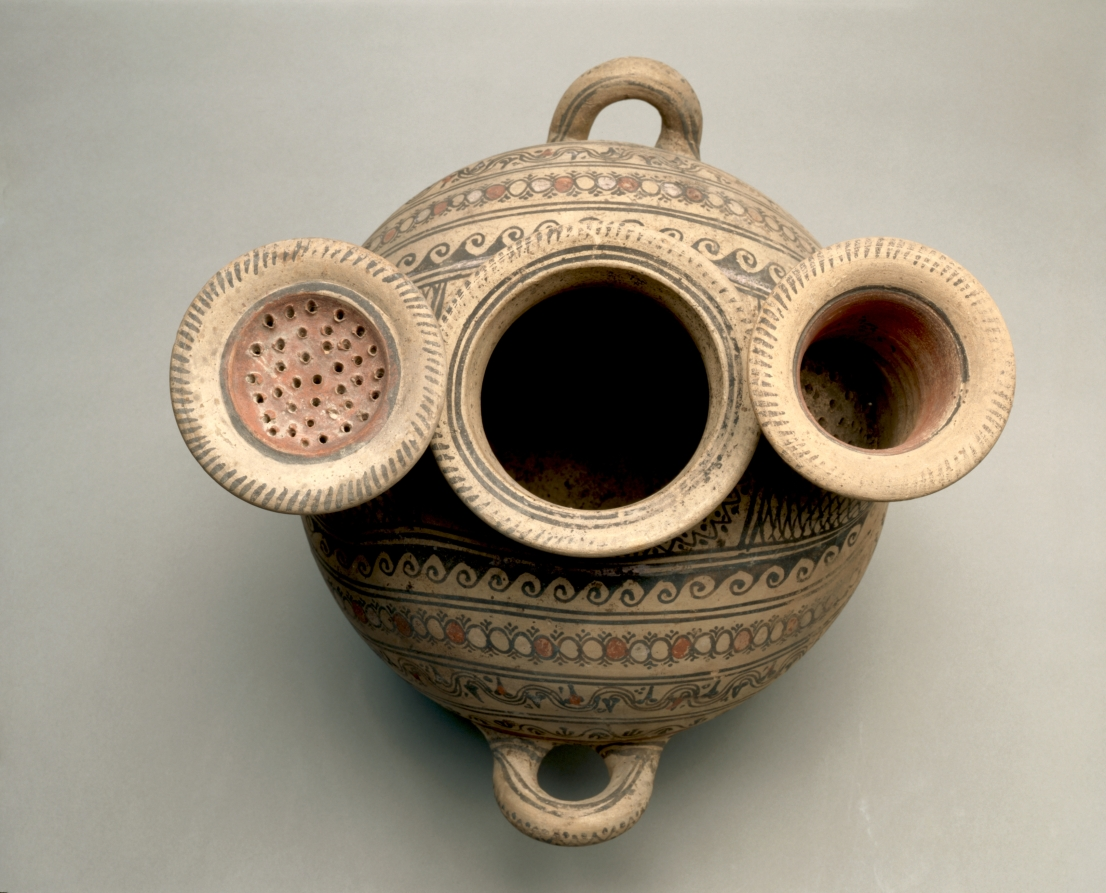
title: Two-Spouted Strainer Askos (Flask) with Lid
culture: South Italian, Daunian or Canosan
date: 300–200 BCE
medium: ceramic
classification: Ceramic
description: Although now referred to by the Greek term askos, because of its resemblance to the animal skins used to hold wine in ancient Greece, this ceramic shape developed in the South Italian region of Daunia (north of Apulia, on the Adriatic coast). This example is unusual for its three openings—one covered by a lid, the others spouted with built-in strainers. Its profusely painted decoration, mostly geometric and vegetal patterns applied in black with added red and white, is arranged in bands that follow the contours of the vessel.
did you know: Each spout has a built-in strainer—one near the top, the other near the bottom.